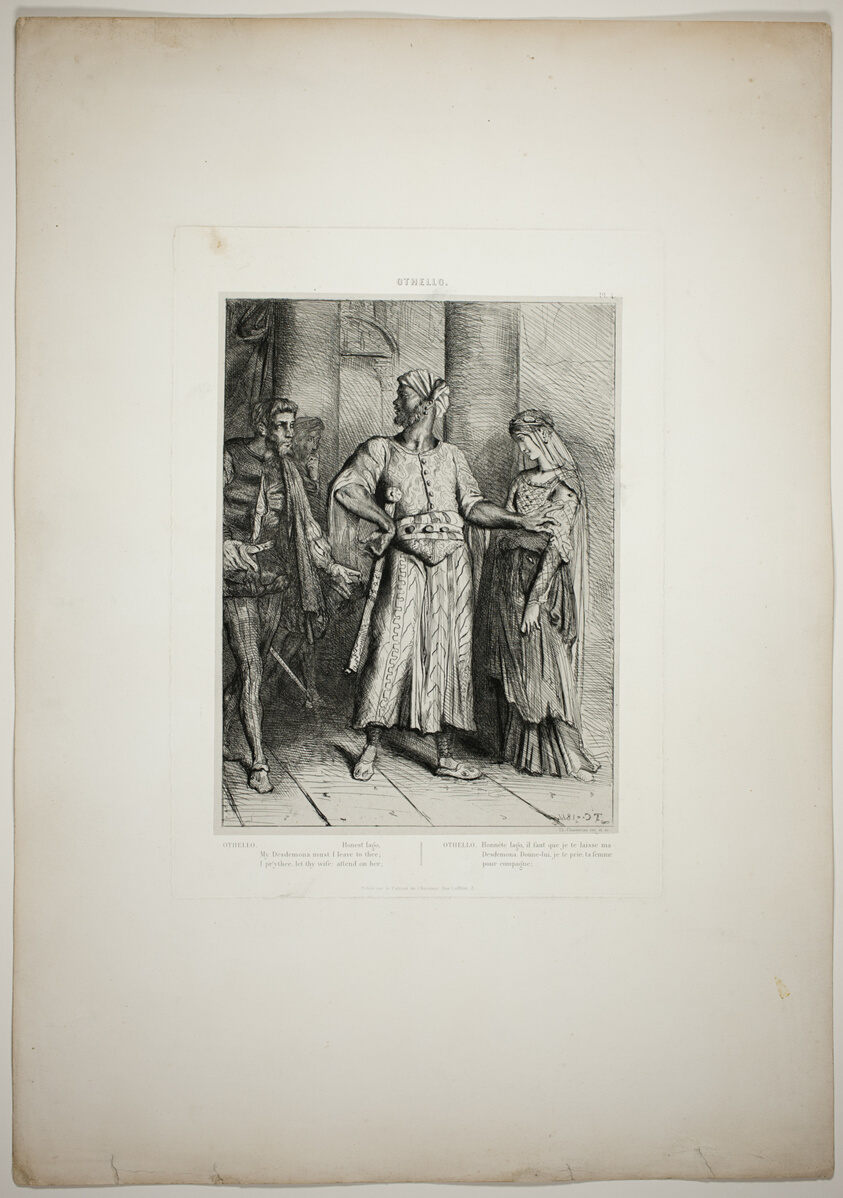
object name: Print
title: Honest Iago, my Desdemona must I leave to thee, plate four from Othello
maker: Théodore Chassériau (French, 1819-1856)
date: 1844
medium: Etching, engraving, roulette, and drypoint on paper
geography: France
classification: etching; print; prints and drawing